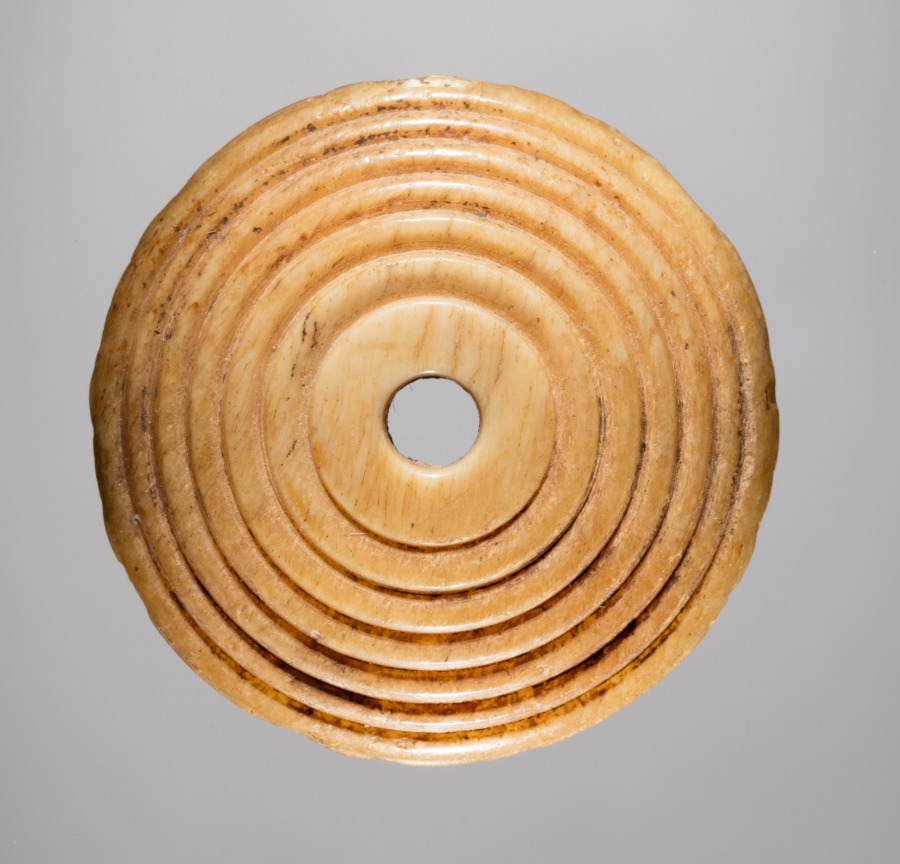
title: Spindle Whorl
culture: Iran, early Islamic period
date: 700s - 900s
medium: bone, incised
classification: Spindle Whorl